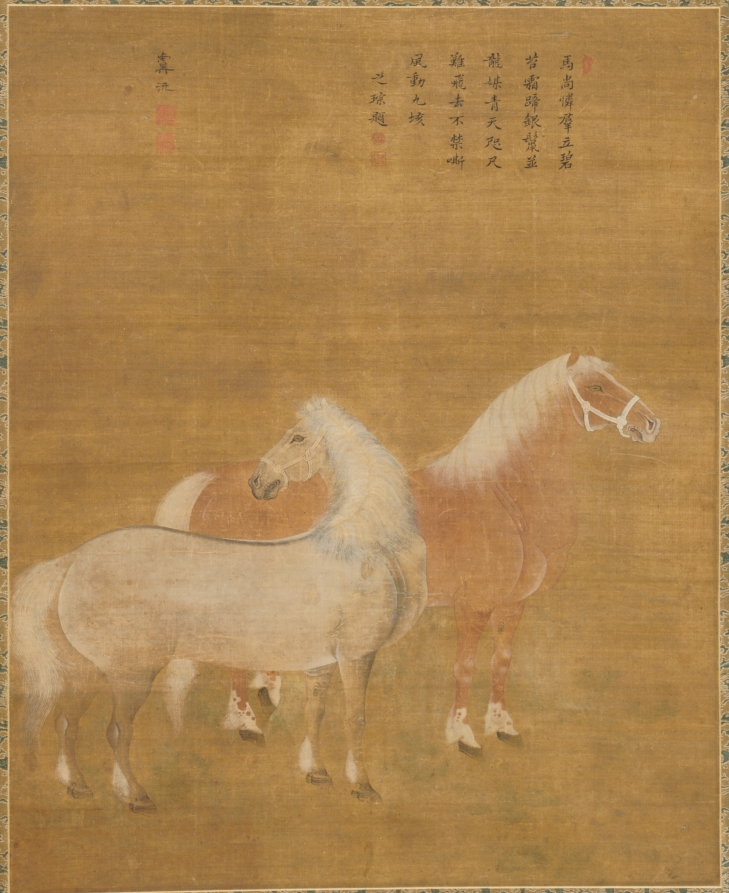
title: Two Horses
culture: China, Qing dynasty (1644-1911)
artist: attributed to Yu Yuan (Chinese, active 1700s)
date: 1644–1911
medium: Hanging scroll; ink and color on silk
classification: Painting